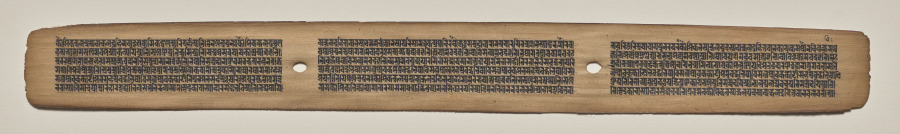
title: Text, Folio 32 (recto), from a Manuscript of the Perfection of Wisdom in Eight Thousand Lines (Ashtasahasrika Prajnaparamita-sutra)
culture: Eastern India, Bihar, Vikramashila Monastery. Painting: Nepal, Kathmandu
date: Sunday, September 14, 1119 (year 239 of the Newar Samvat in the month of Ashvina)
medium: gum tempera and ink on palm leaves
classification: Painting